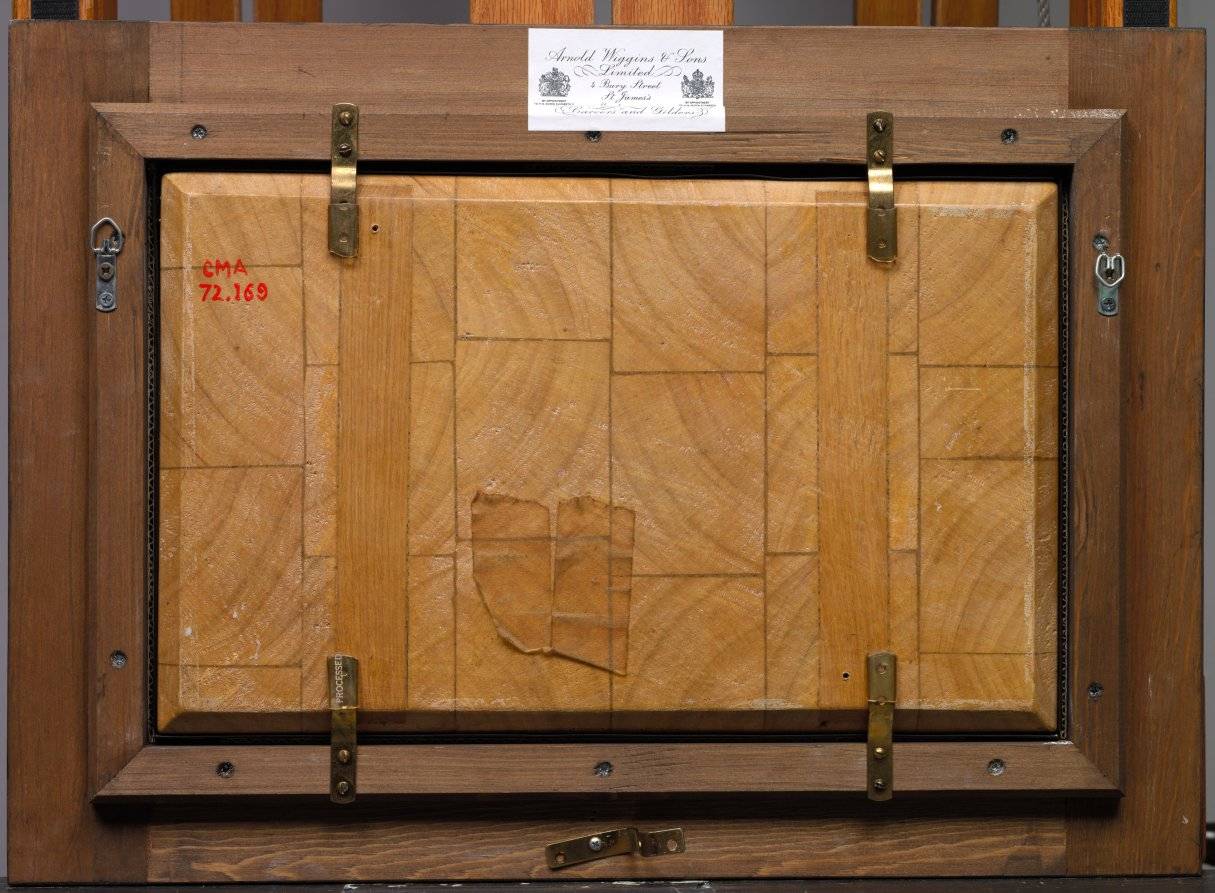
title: The Denial of Peter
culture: Netherlands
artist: Peter Wtewael (Dutch, 1596–1660)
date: c. 1624–28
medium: oil on wood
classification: Painting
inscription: Signed upper right: "Pet[...] / W[...]"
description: Wtewael depicted the moment after the Last Supper when the apostle Peter (at the left) denied knowing Jesus in order to protect himself from Roman soldiers searching for Christ's followers. Few works by this artist are known, and he draws on an unusual combination of styles. The dramatic use of light derives from Dutch followers of the Italian painter Caravaggio, in vogue around 1625, while the twisting bodies, startlingly low viewpoint, and tight detailing come from a more refined, courtly mode more popular earlier in the century.